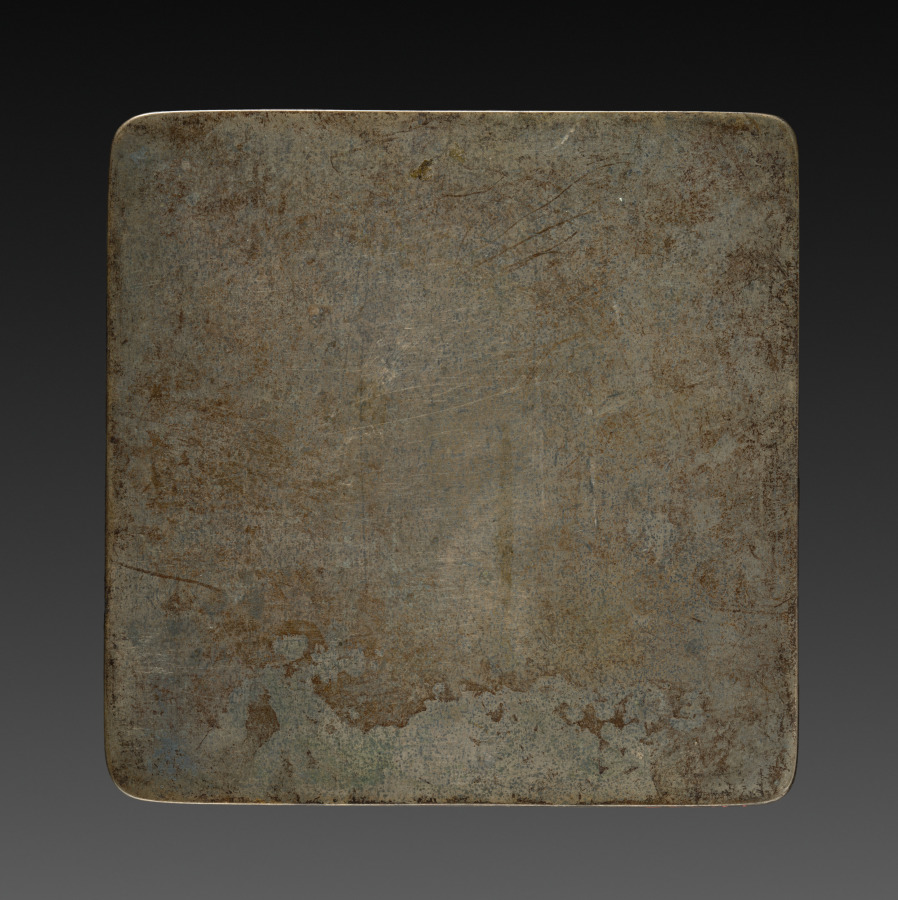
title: Mirror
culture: Japan, Muromachi period (1392–1573)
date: 1392–1573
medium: bronze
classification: Metalwork